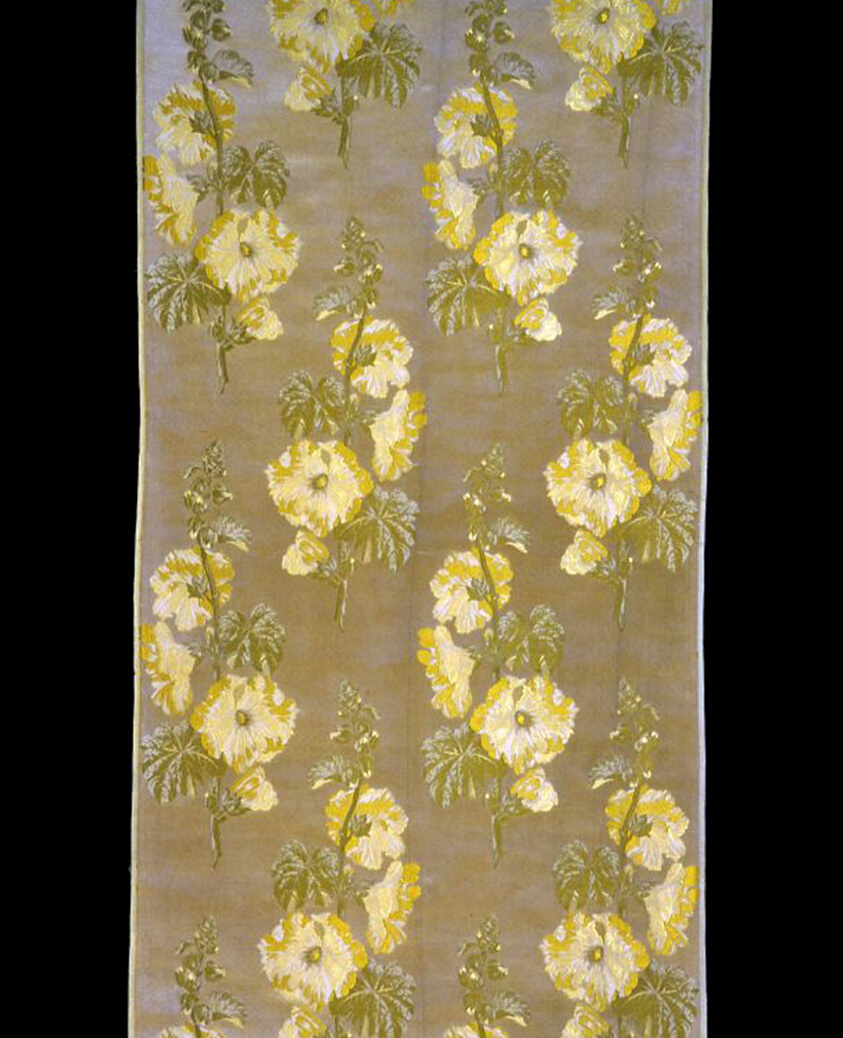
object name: Textile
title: Panel from a Skirt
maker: France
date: c. 1890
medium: Silk, warp-float faced 7:1 satin weave self-patterned by complementary ground weft floats and areas of plain weave; woven on loom with Jacquard attachment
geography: France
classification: textile; weaving